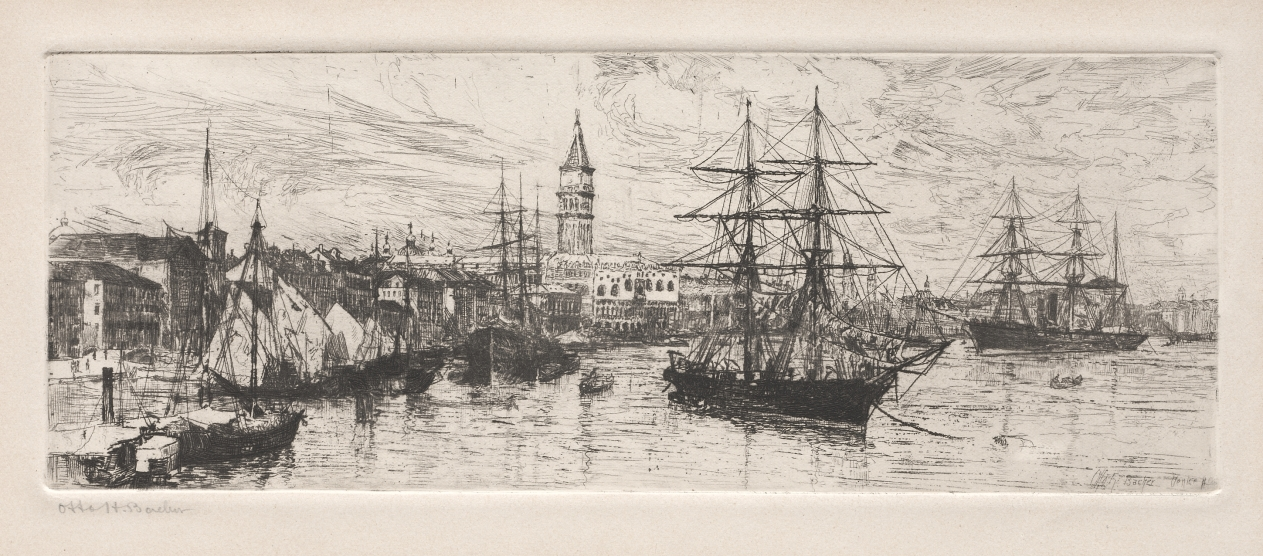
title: Shipping and the Ducal Palace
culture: America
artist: Otto H. Bacher (American, 1856–1909)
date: 1888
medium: etching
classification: Print